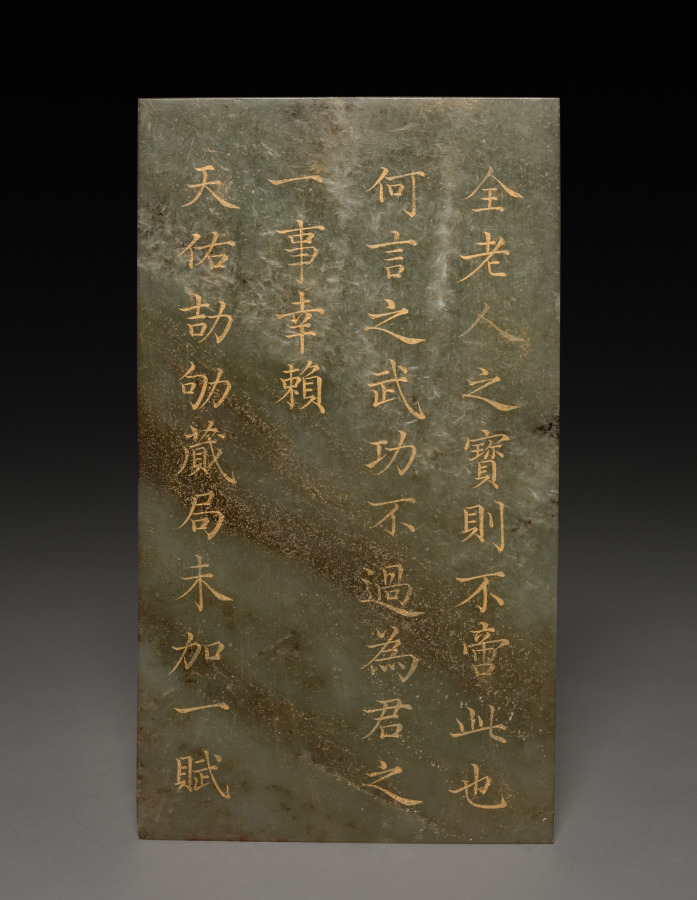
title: Tablet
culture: China, Qing dynasty (1644–1911), Qianlong reign (1736–95)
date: 1778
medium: jade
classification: Jade